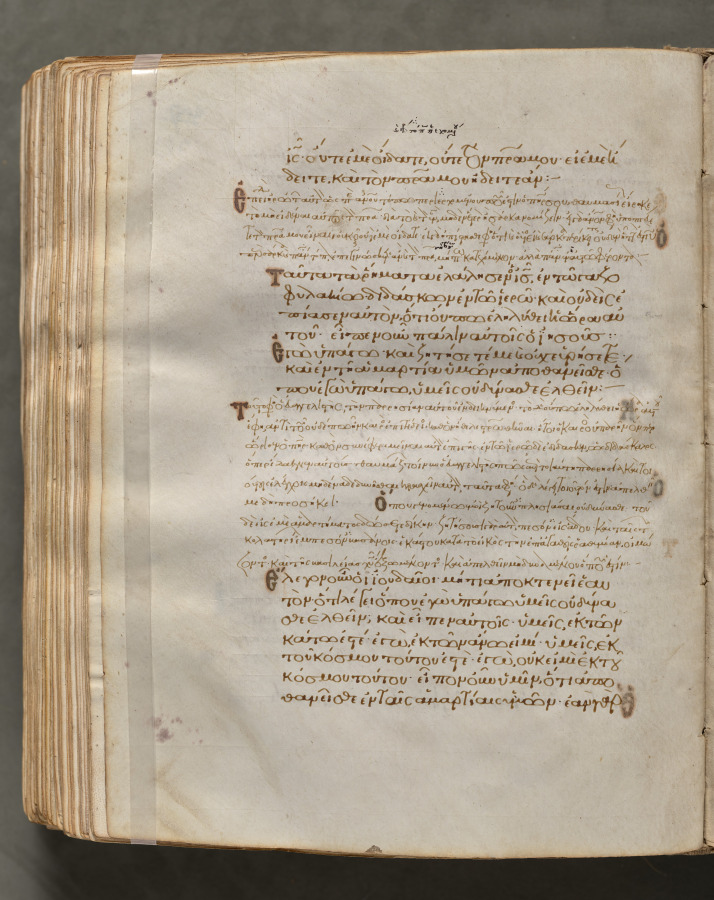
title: Text, folio 363 (verso), from a Gospel Book with Commentaries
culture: Byzantium, Constantinople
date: c. 1000–1100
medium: ink, tempera, and gold on vellum; leather binding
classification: Bound Volume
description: Each of the four gospels in this book opens on a page with brilliantly illuminated borders depicting the author of the text as well as birds—principally peacocks, symbols of the immortality of the soul—and fountains, representing the fountain of life and the salvation of the soul. This volume consists of 428 leaves with texts in Greek. Its level of sophistication suggests that it was probably written and decorated in a monastery in Constantinople.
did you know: Gospel books were carried in procession through Byzantine churches.